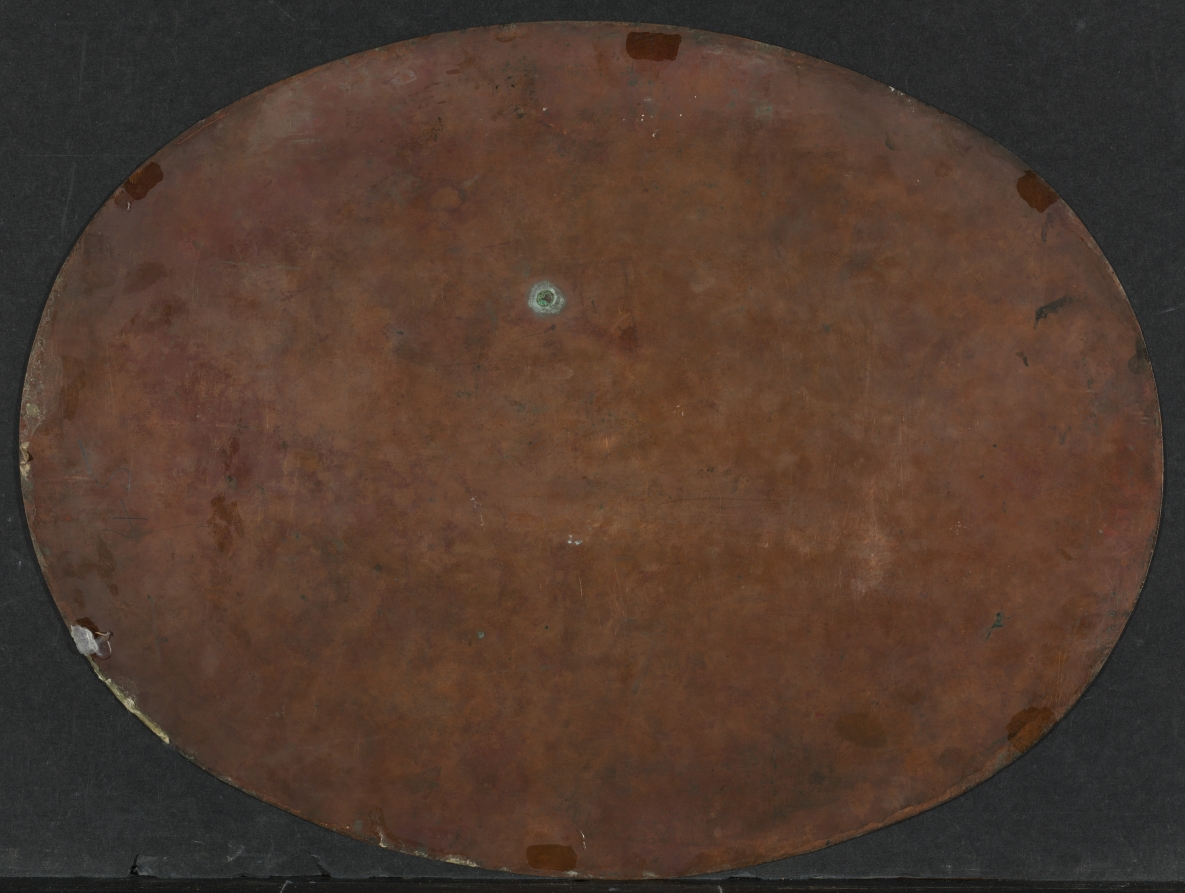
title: Mercury and Argus in a Landscape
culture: Netherlands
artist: Dirck van der Lisse (Dutch, 1669)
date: c. 1635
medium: oil on copper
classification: Painting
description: This painting depicts a scene from ancient myth. The queen of the gods, Juno, jealous of her husband Jupiter's affair with Io, changed the mortal woman into a cow. Juno then ordered Argus - a giant with many eyes - to watch over Io constantly. In response, Zeus sent Mercury, the god of deception, to free Io. Mercury lulled Argus to sleep by playing the flute, then killed him and released the cow. The artist set the scene in a landscape with classical ruins. The expansive vista belongs to an earlier tradition that evokes the immenseness of the world through panoramic views, offering the suggestion of boundless space.